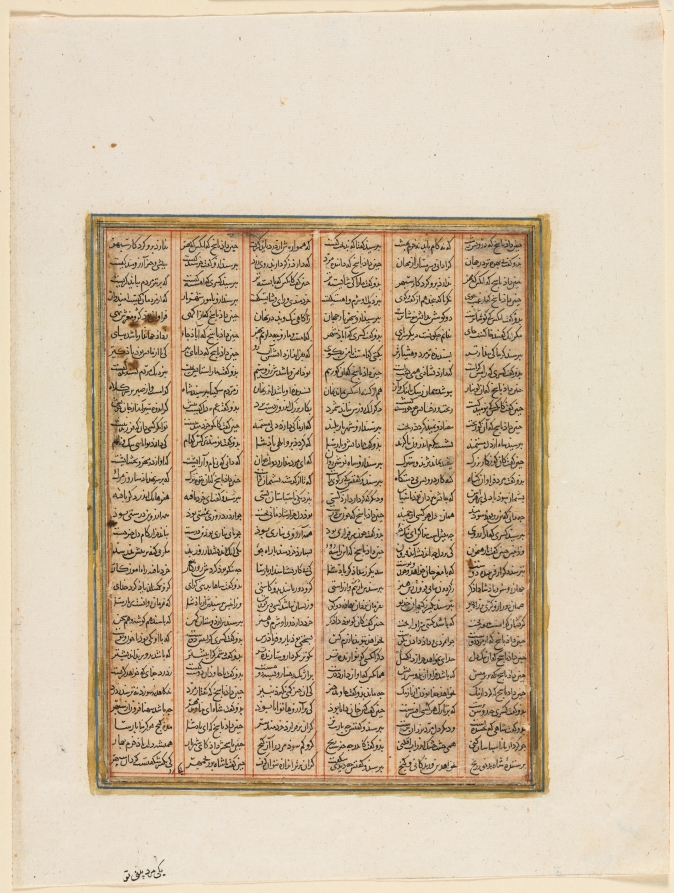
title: The Reign of Nushirwan, the Combat between the Khan of Chin and the Haitalians (verso) from a Shahnama (Book of Kings) of Firdausi (940–1019 or 1025)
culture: Iraq, Baghdad, Ilkhanid period (1256-1353)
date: c.1299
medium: ink and opaque watercolor on paper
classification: Manuscript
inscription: script: Naskh